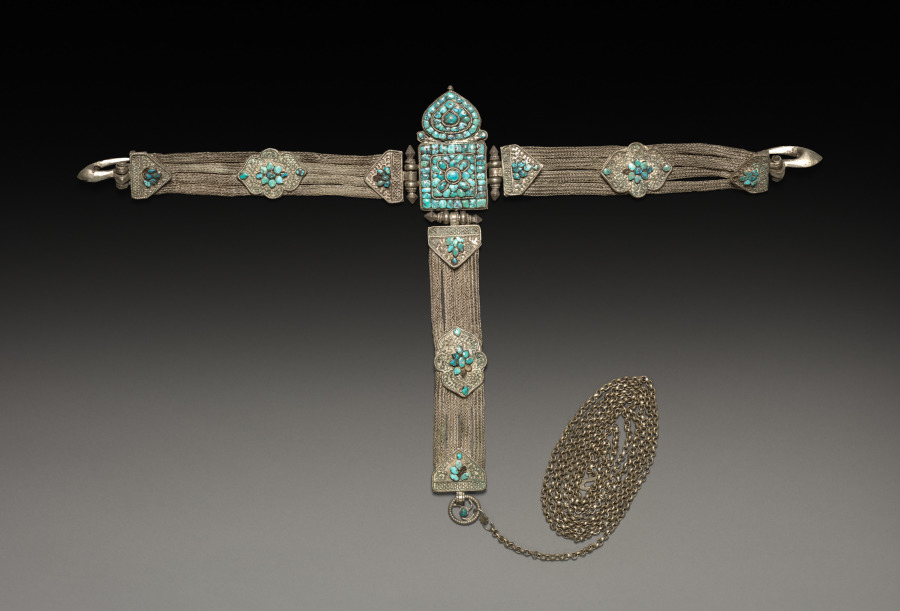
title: Girdle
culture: Tibet(?)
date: 1800s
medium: silver with turquoise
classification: Jewelry